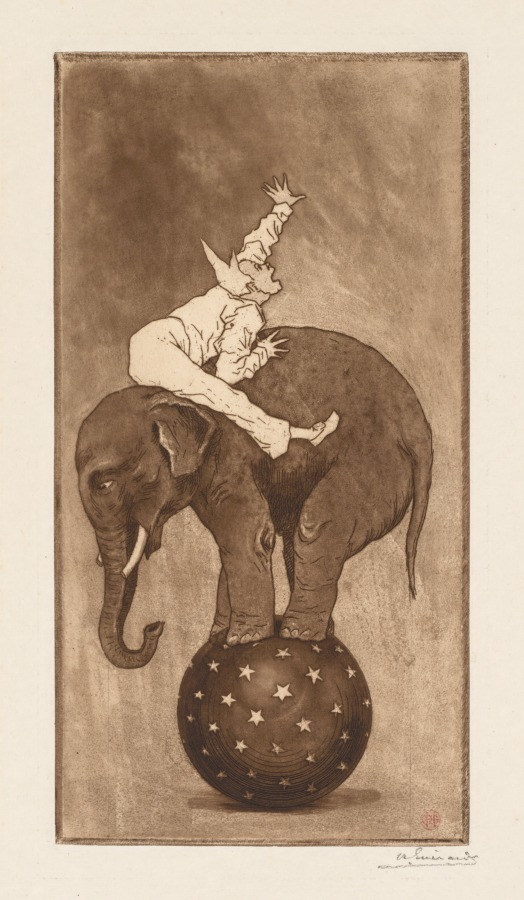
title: Elephant and Clown (L'Elephant et le Clown)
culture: France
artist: Henri Charles Guérard (French, 1846–1897)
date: c. 1889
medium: etching and aquatint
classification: Print